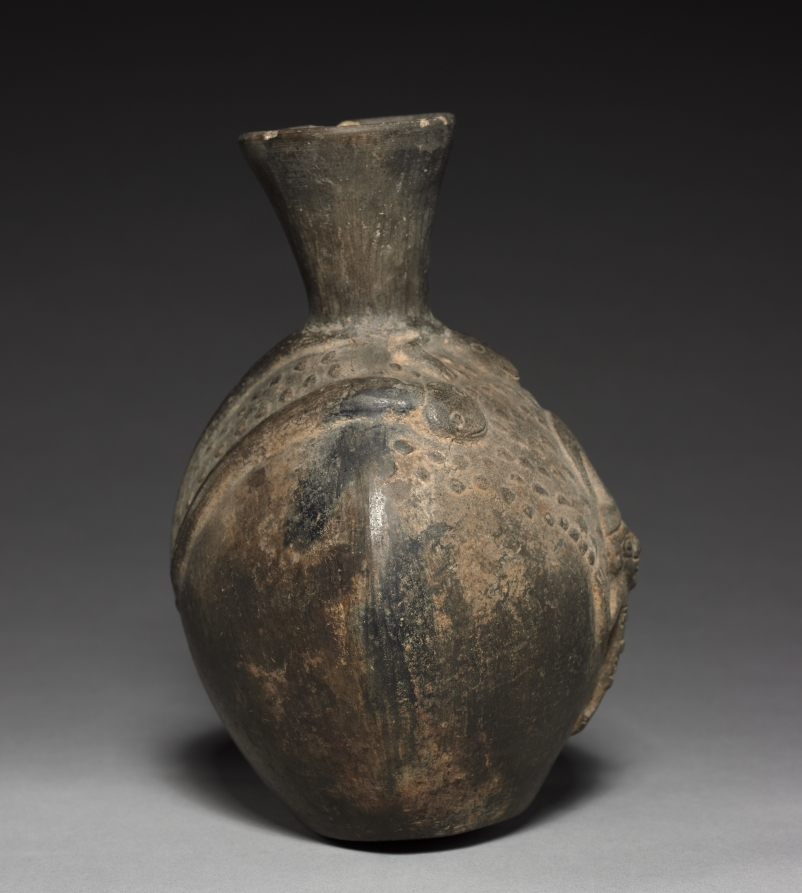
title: Bottle with Figure in Relief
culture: Peru, probably Chiclaya, Chimú, 13th-15th century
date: 1200s-1400s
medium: black ware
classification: Ceramic